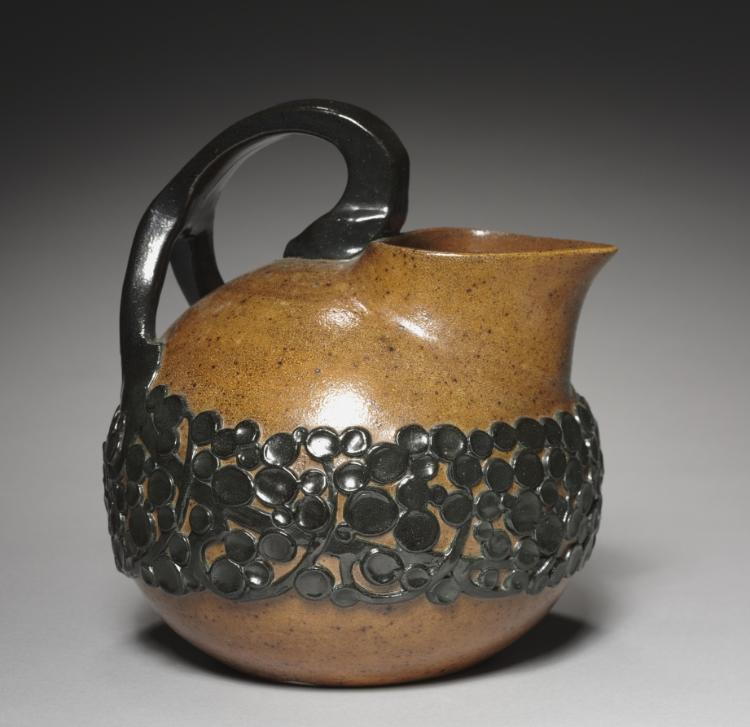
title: Pitcher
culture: Germany, Grenzhausen, early 20th Century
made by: Reinhold Merkelbach, Grenzhausen (German)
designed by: Richard Riemerschmid (German, 1868–1957)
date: c. 1900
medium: stoneware, salt-glaze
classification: Ceramic